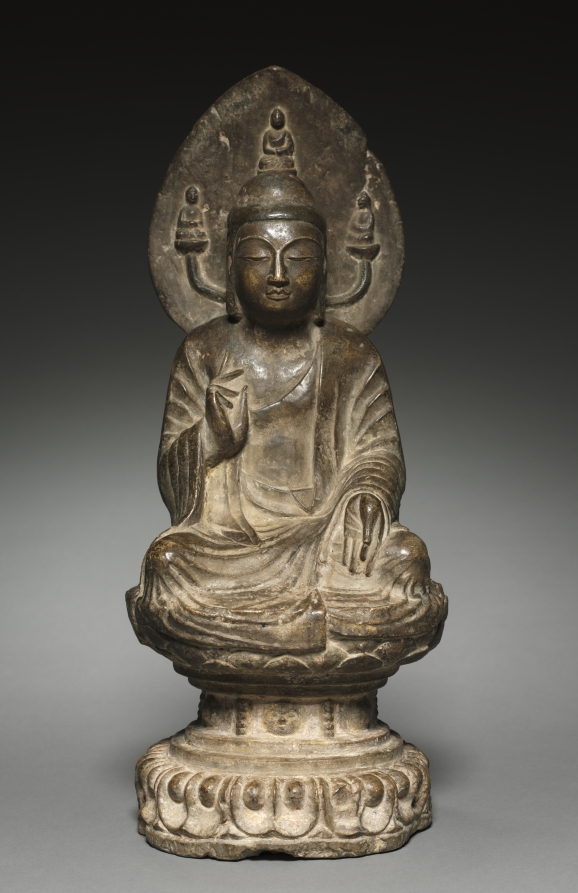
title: Amida Buddha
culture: China, Sui dynasty (581-618)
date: 581–618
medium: limestone with traces of polychromy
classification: Sculpture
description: The leaf-shaped halo of this seated Buddha bears the rare, unusual icon of the three nirmana Buddhas, which represents a symbolic homage of the Buddhas of the past, the present, and the future—manifestations of the Buddha in infinite time and space. Another interpretation is that the three figures without halos represent souls reborn in the Western Paradise thanks to Amida Buddha's divine intervention.